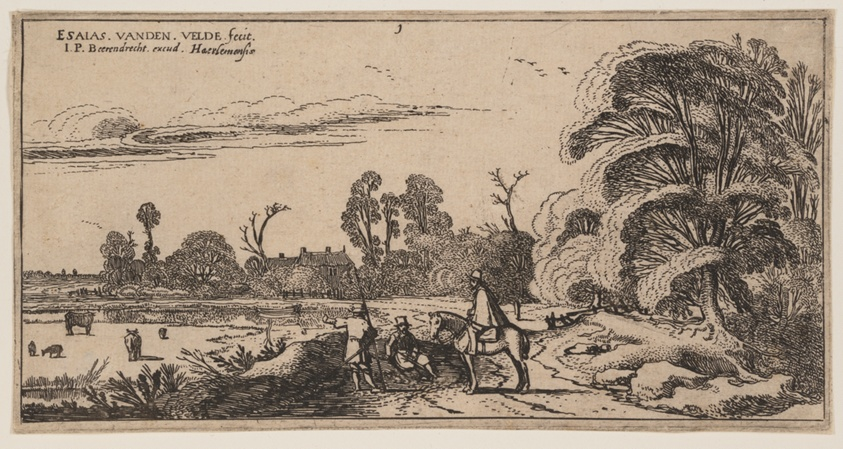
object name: Print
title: Path to the Right of a Field, from Landscapes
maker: Esaias van de Velde; Dutch, 1587–1630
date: c. 1610-1630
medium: Etching on ivory laid paper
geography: Netherlands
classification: etching; paper; print; prints and drawing